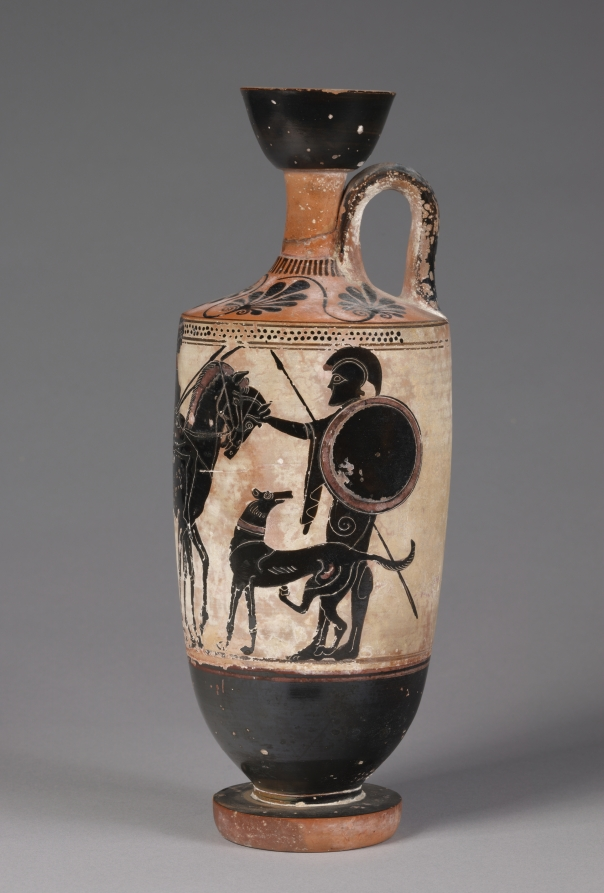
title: Black-Figure White-Ground Lekythos (Oil Vessel): Horseman, Horse between Warriors, Dog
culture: Greek, Attic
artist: attributed to Edinburgh Painter (Greek, Attic, active c. 505–485 BCE)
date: c. 500 BCE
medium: ceramic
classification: Ceramic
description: Two armed warriors, each wearing a crested helmet and holding a spear and shield, flank a mounted horseman, who leads another horse. The warrior at right reaches up with one hand to the head of the second horse, raising the question of how he still holds his spear. Below, a dog twists to scratch itself and look back, its right hind foot apparently resting on one of the warrior’s.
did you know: The Edinburgh Painter was the first artist to paint black-figure decoration on a white ground.